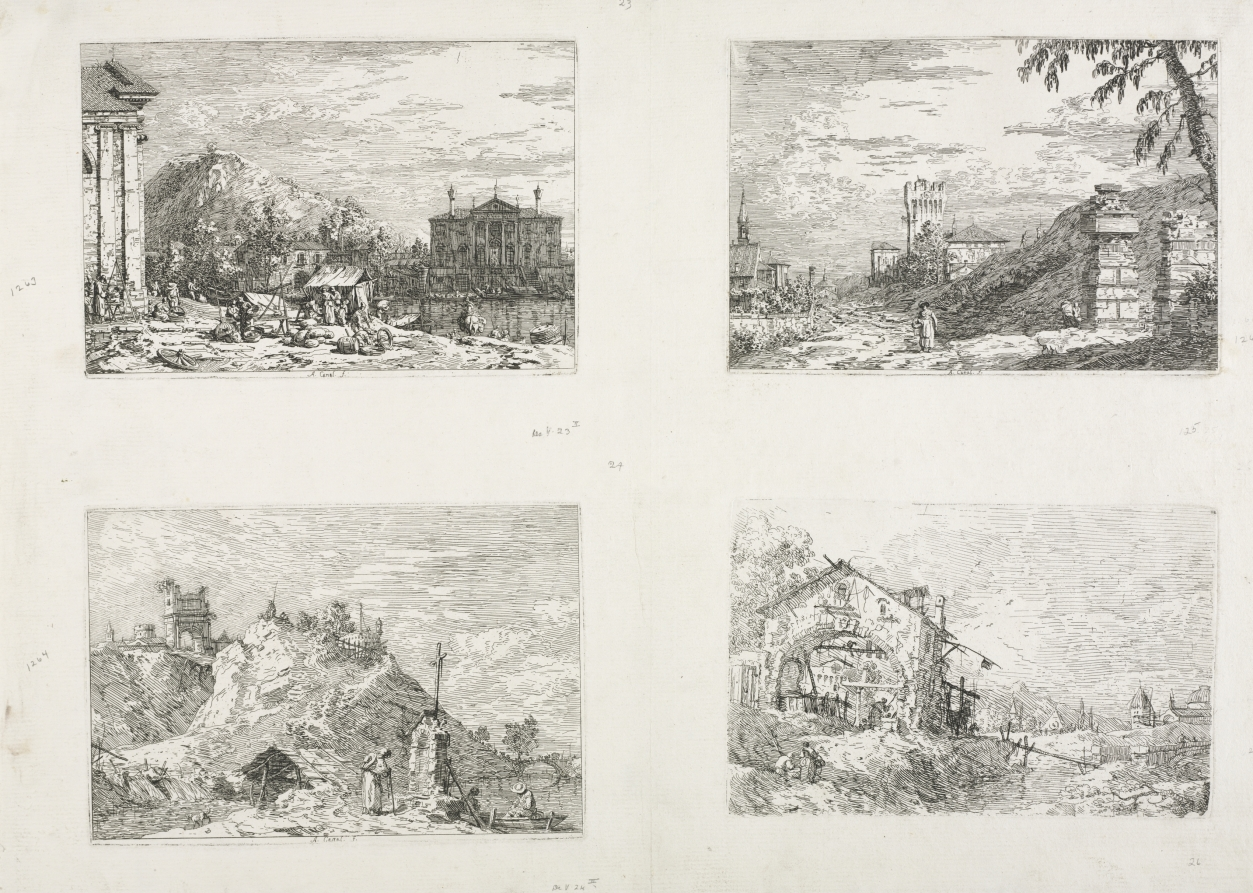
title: Views: A Woman Drawing Water under an Arch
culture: Italy, Venice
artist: Antonio Canaletto (Italian, 1697–1768)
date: 1735–1746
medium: etching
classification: Print